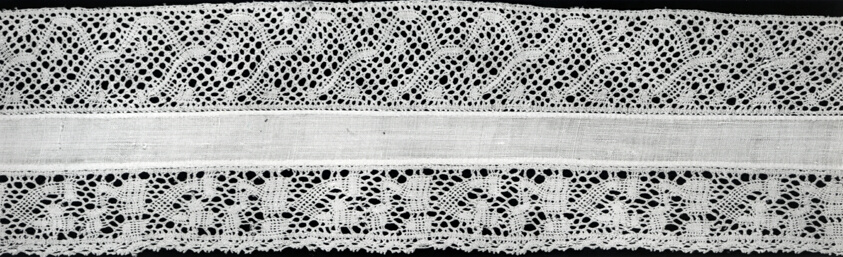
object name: Textile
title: Fragment (Border and Insertion)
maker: Italy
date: 1750/1800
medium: Linen, bobbin straight lace; plain weave with hem stitching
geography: Italy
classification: textile; lace - bobbin